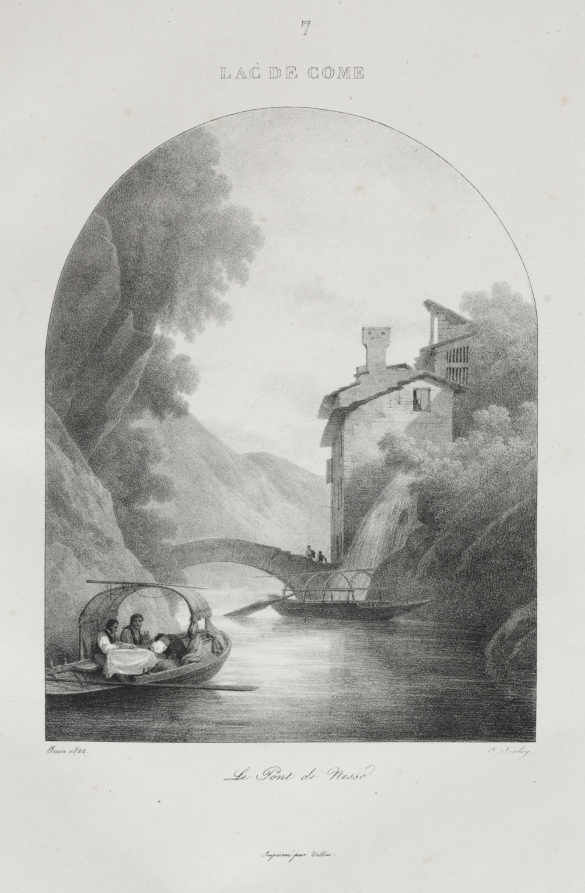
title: Voyage en Italie en 1822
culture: France, 19th century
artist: Jean-Baptiste Isabey (French, 1767–1855)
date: 1833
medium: lithograph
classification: Bound Volume